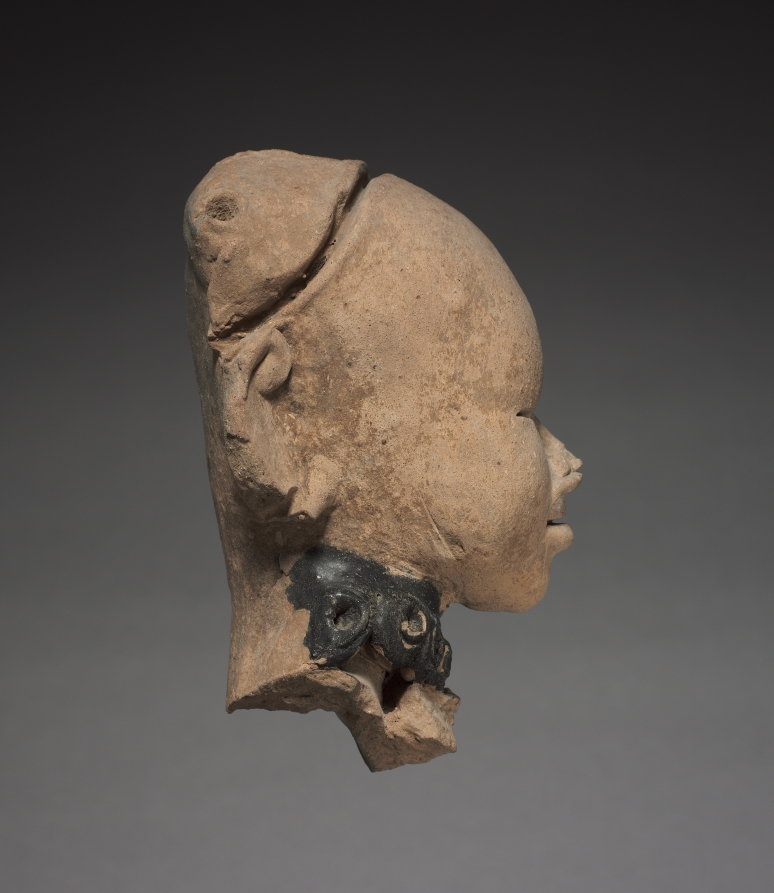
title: Smiling Head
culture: Mexico, Classic Veracruz (Totonac or Tajin)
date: 600–1100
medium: terracotta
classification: Sculpture